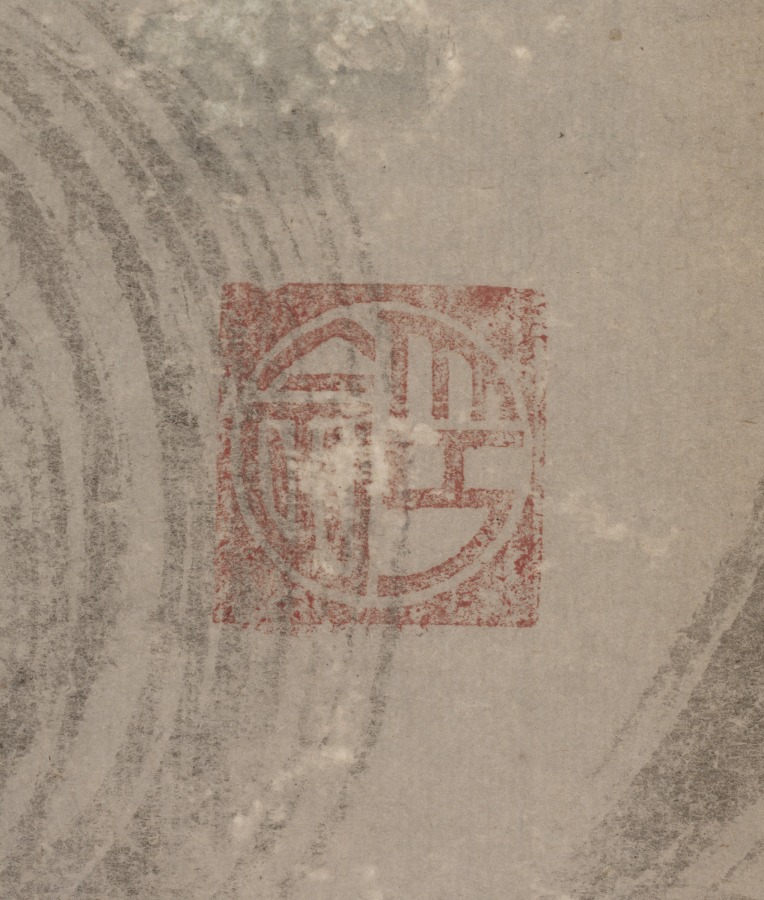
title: The Ascending Daoist Immortal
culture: Japan, Edo period (1615–1868)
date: 1700s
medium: hanging scroll; ink on paper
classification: Painting